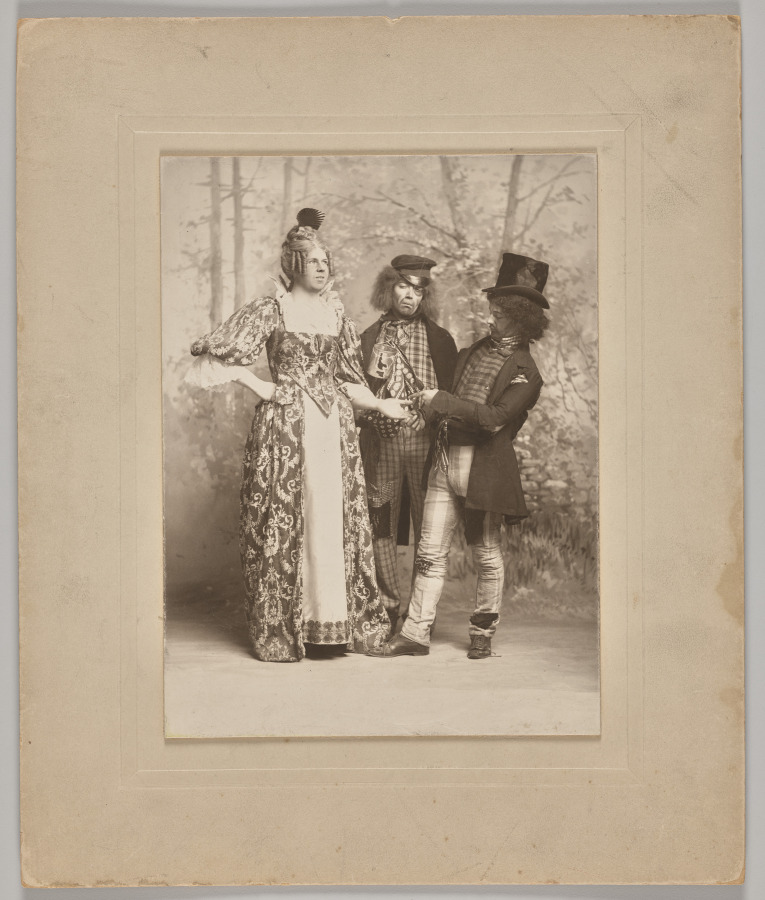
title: Untitled (theatrical scene with 3 figures: the palm reader)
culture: England, 19th century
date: 1880s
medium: woodburytype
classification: Photograph